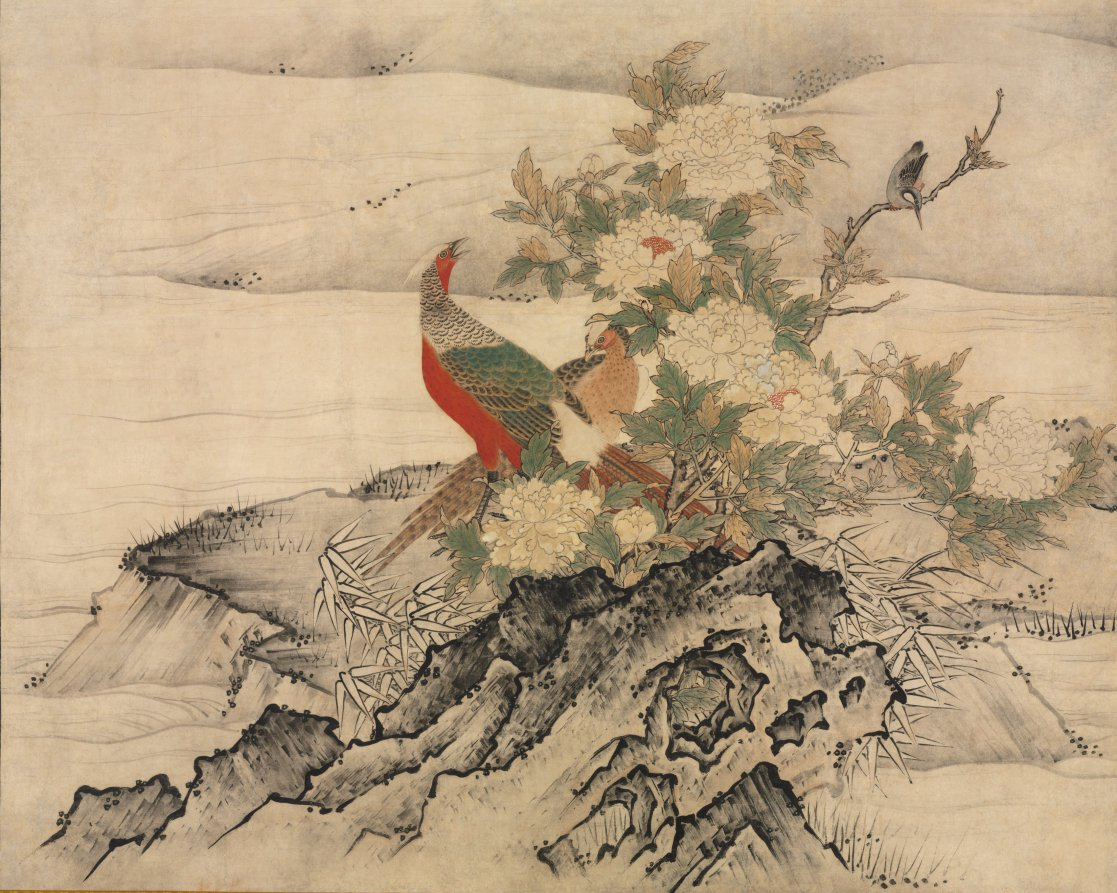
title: Flowers and Birds in a Spring Landscape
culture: Japan, Muromachi period (1392–1573)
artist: attributed to Kano Motonobu (Japanese, c. 1476–1559)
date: 1500s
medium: One of a set of sliding door panels mounted as hanging scrolls; ink and color on paper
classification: Painting